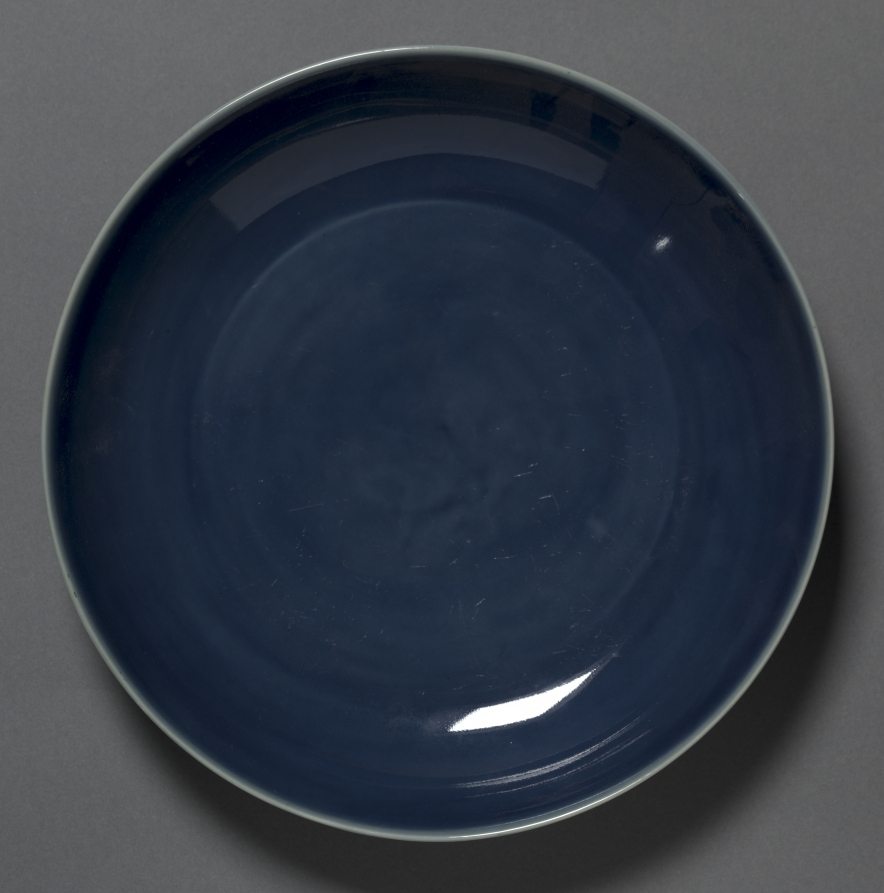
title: Dish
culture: China, Jiangxi province, Jingdezhen kilns, Ming dynasty (1368-1644), Wanli mark and reign (1573-1619)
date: 1573–1619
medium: porcelain with blue glaze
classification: Ceramic